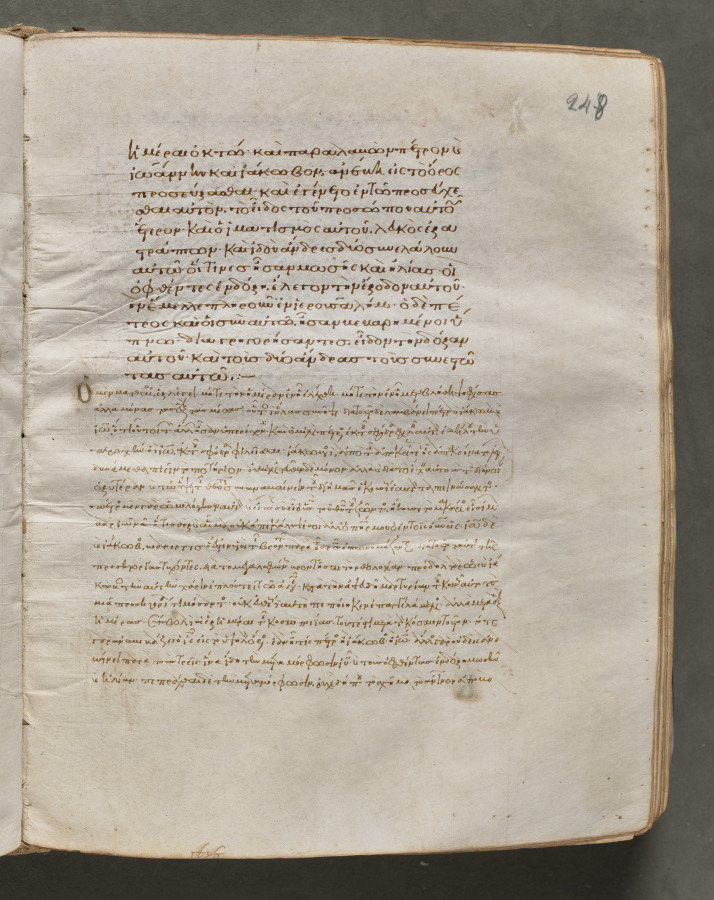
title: Text, folio 248 (recto), from a Gospel Book with Commentaries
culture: Byzantium, Constantinople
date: c. 1000–1100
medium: ink, tempera, and gold on vellum; leather binding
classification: Bound Volume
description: Each of the four gospels in this book opens on a page with brilliantly illuminated borders depicting the author of the text as well as birds—principally peacocks, symbols of the immortality of the soul—and fountains, representing the fountain of life and the salvation of the soul. This volume consists of 428 leaves with texts in Greek. Its level of sophistication suggests that it was probably written and decorated in a monastery in Constantinople.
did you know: Gospel books were carried in procession through Byzantine churches.